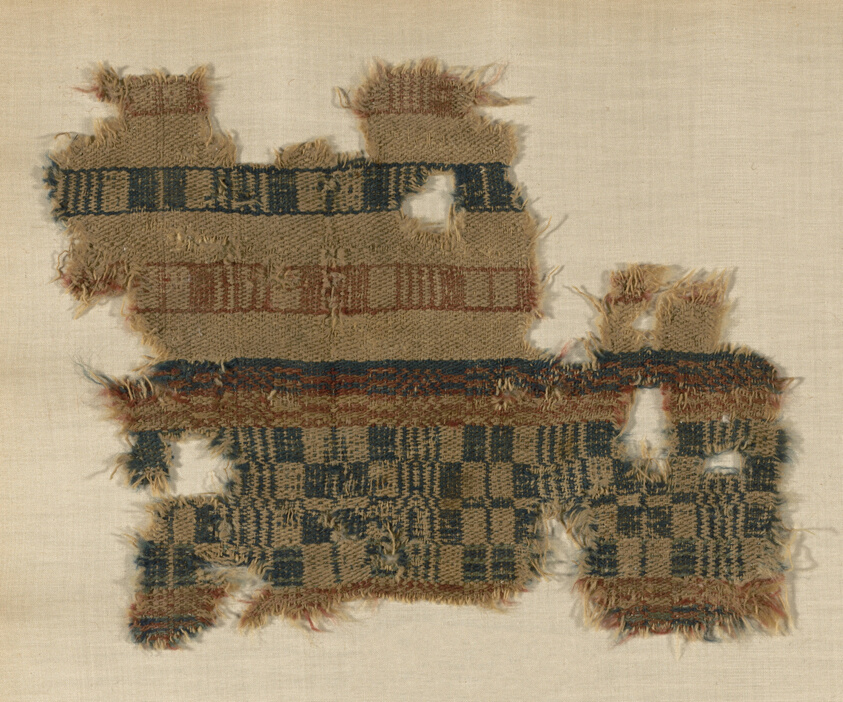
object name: Textile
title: Fragment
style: roman period (egyptian)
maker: Egypt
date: Roman period (30 B.C.– 641 A.D.), 4th century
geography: Egypt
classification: textile; weaving